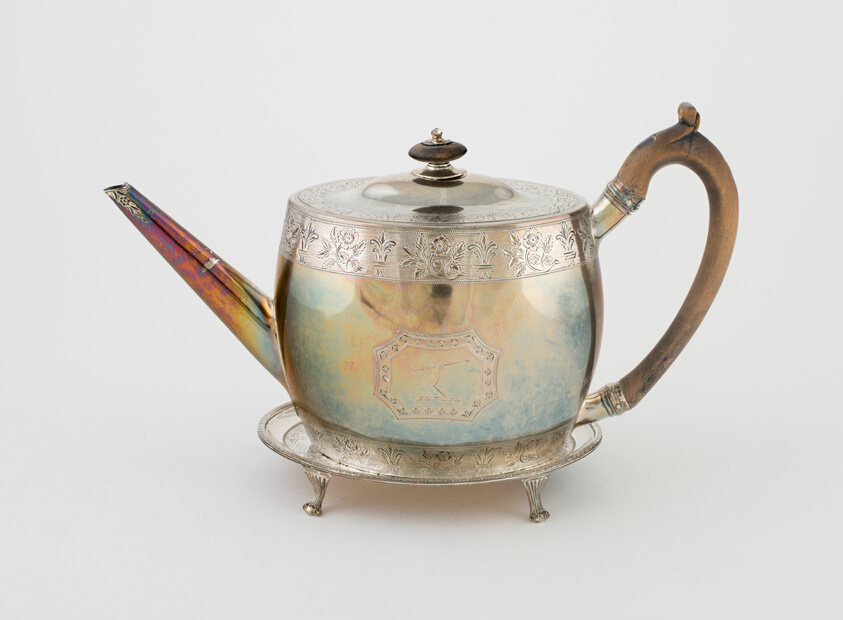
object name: Metalwork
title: Teapot and Stand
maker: William Vincent; English, active 1790; London, England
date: 1790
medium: Silver and wood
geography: London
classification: teapot; silver; metalwork; european decorative arts